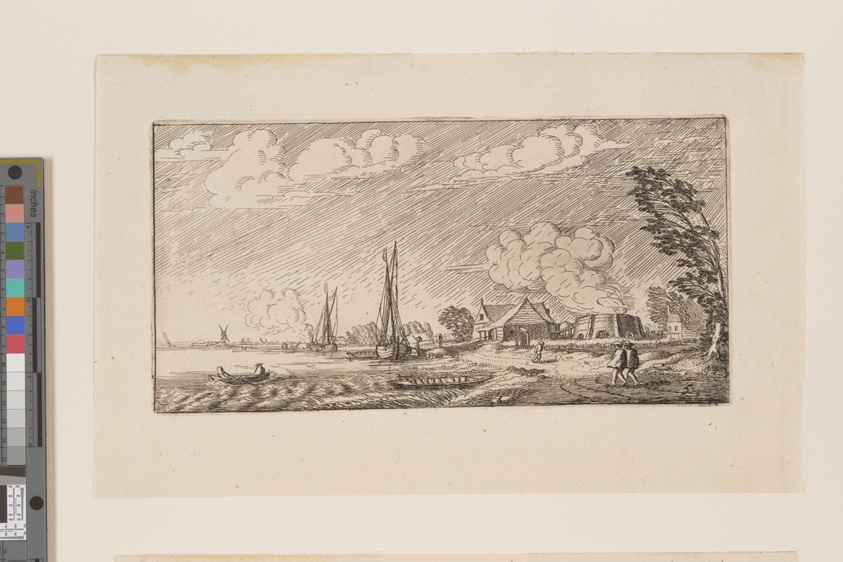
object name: Print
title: Lime-Kiln in Stormy Weather, from Six Landscapes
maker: Jan van de Velde II; Dutch, c. 1593–1641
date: c. 1613-1640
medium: Etching on ivory laid paper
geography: Netherlands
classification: etching; paper; print; prints and drawing